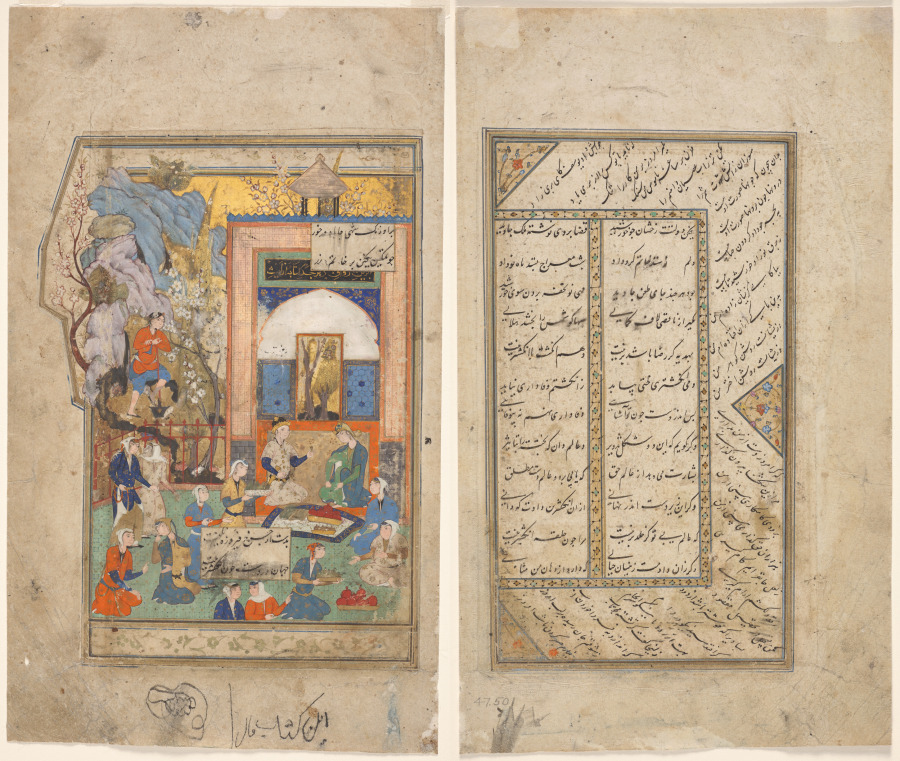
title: Yusuf and Zulaykha (recto); Text Page, Persian Verses (verso)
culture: Iran, Shiraz or Mashhad, Safavid period (1501–1722)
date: c. 1556–65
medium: Gum tempera, ink, and gold on paper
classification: Manuscript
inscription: Script: Nasta'liq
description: The painting quotes verses from the Haft Awrang (Seven Thrones) by the Persian poet Jami, a classic of Persian literature, here illustrating the romance of Yusuf and Zulaykha. Originally rooted in the Qur’an (Surah Yusuf, chapter 12), the Prophet Yusuf (Joseph) encounters the wife of the Egyptian governor, traditionally identified as Zulaykha, both seated opposite each other on the right, framed by architecture.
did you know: Beyond the fence, a man is shoveling.